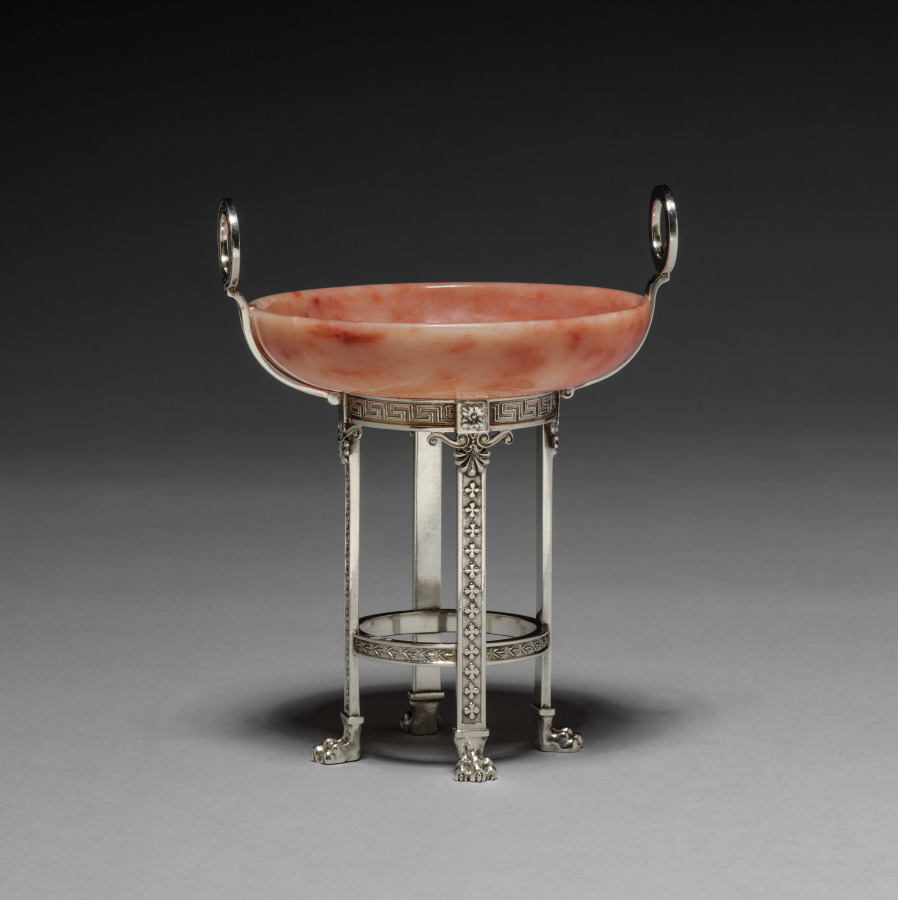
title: Miniature Compote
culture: Russia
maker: House of Fabergé (Russian, 1842–1918)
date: 1896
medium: silver, aventurine quartz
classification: Silver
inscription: Stamped: Fabergé (in Cyrillic) surmounted by double-headed eagle (imperial warrant); 1896, surmounted by tester's initials for Lev Oleks (active 1895-8), 84, Saint George [three punch assay mark for Moscow]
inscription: Scratched: 7796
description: The House of Fabergé specialized in the creation of little treasures intended as opulent personal gifts. In creating luxurious accessories for a desk or tabletop, Fabergé often used native hardstones such as multicolored agate and quartz, green nephrite, pink rhodonite, and rock crystal found in the Ural Mountains of western Russia. Fabergé's designers often paired hardstones with silver mounts, particularly in the Moscow workshop where the silver studios were concentrated.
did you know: Pink aventurine is the rarest form of this type of quartz, which is most commonly found in an olive green form.